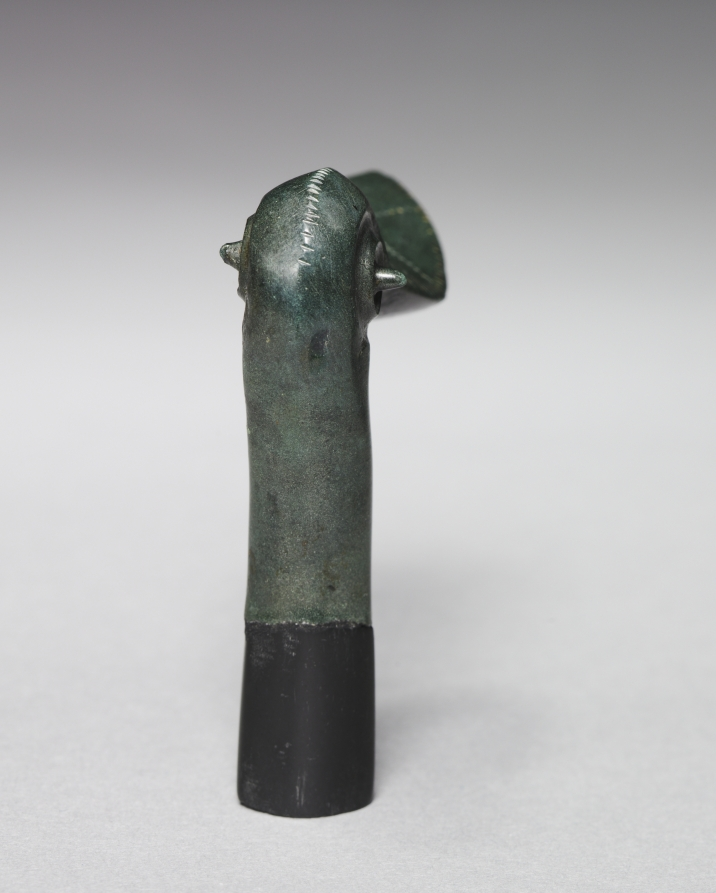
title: Duck Head Finial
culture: possibly Hungary, Bronze Age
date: c. 1400–1300 BCE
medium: bronze, cast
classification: Sculpture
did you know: A decorative object, this duck head finial likely topped a piece of furniture.